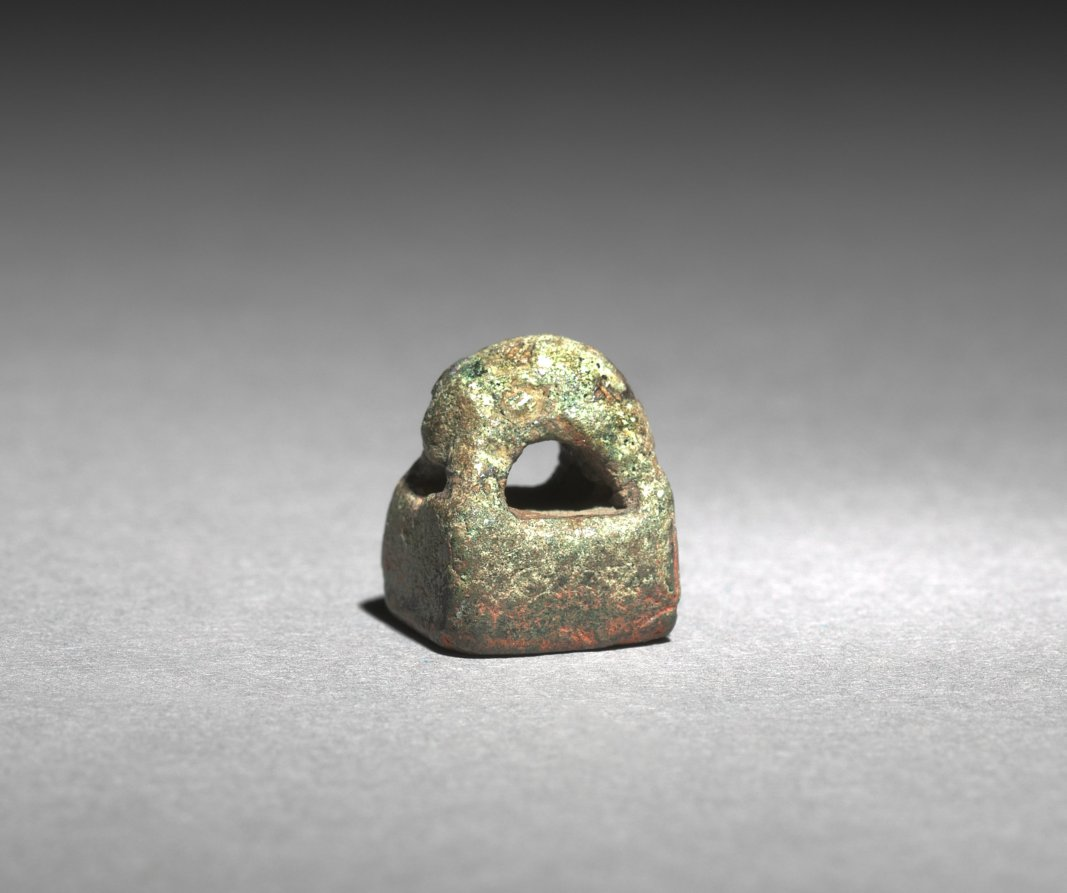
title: Seal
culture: Korea, Goryeo dynasty (918–1392)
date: 1100s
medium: bronze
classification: Metalwork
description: A large quantity of bronze seals were excavated from tombs of the Goryeo dynasty. This turtle-shaped seal bears two inscribed characters: 武貴, meaning "military highness." The red cinnabar paste is still visible, indicating it must have been used for signing various documents, while its owner was still alive.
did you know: A large quantity of bronze seals excavated from tombs of the Goryeo dynasty is closely related to the development of metallurgy in 13th-century Korea that allowed the transition from wood type to movable metal type printing.